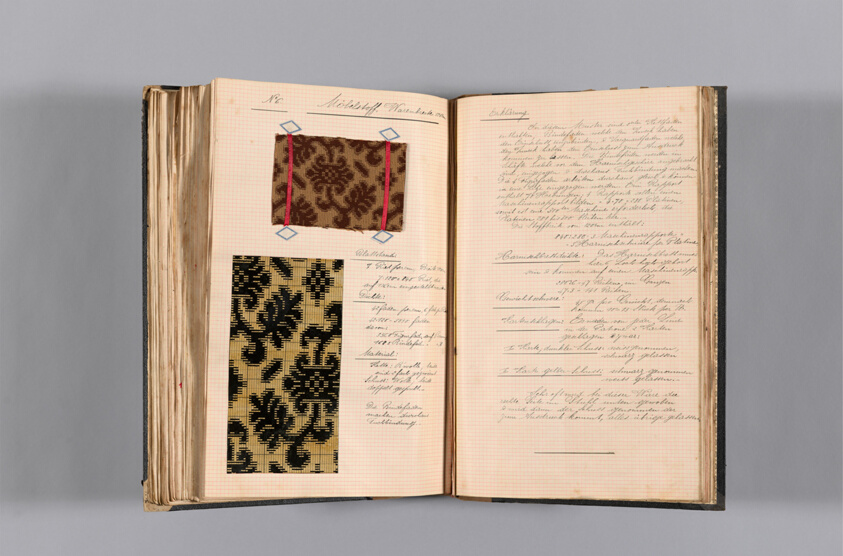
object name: Book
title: Student Notebook Containing Notes, Diagrams and Swatches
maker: Alfred Fehr (Switzerland, 1879-1955)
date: c. 1898–1900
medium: Bound notebook of technical notes and weave samples: fabrics for clothing and mixed goods, ribbed and twill cottons, and jacquard; 176 pages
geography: Germany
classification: book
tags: weaving, diagrams